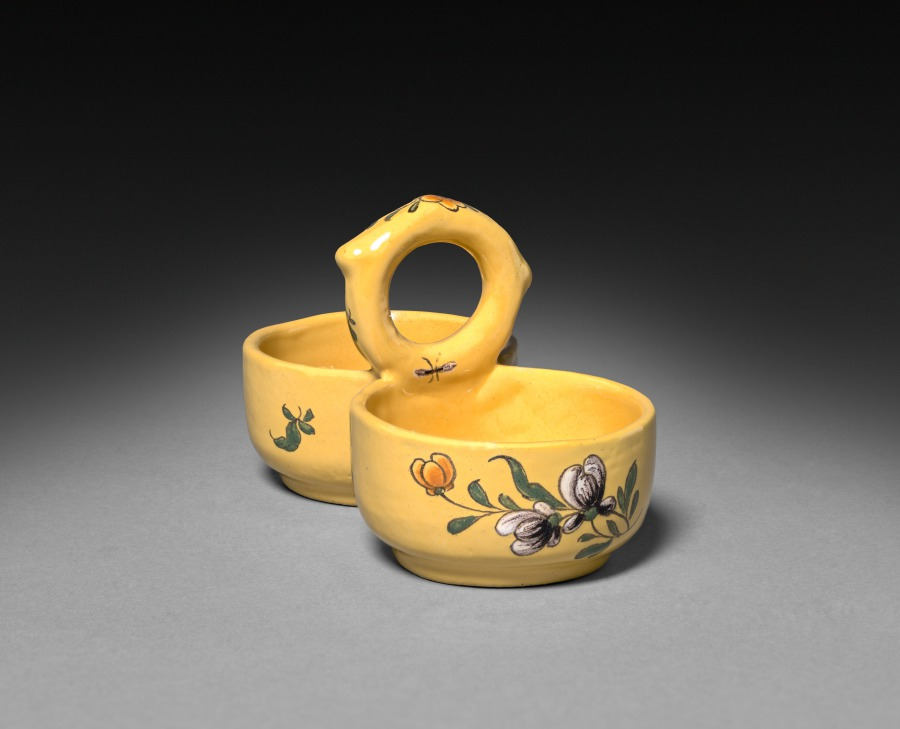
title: Double Salt Dish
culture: France, Moustiers, 18th century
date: c. 1775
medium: faience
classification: Ceramic